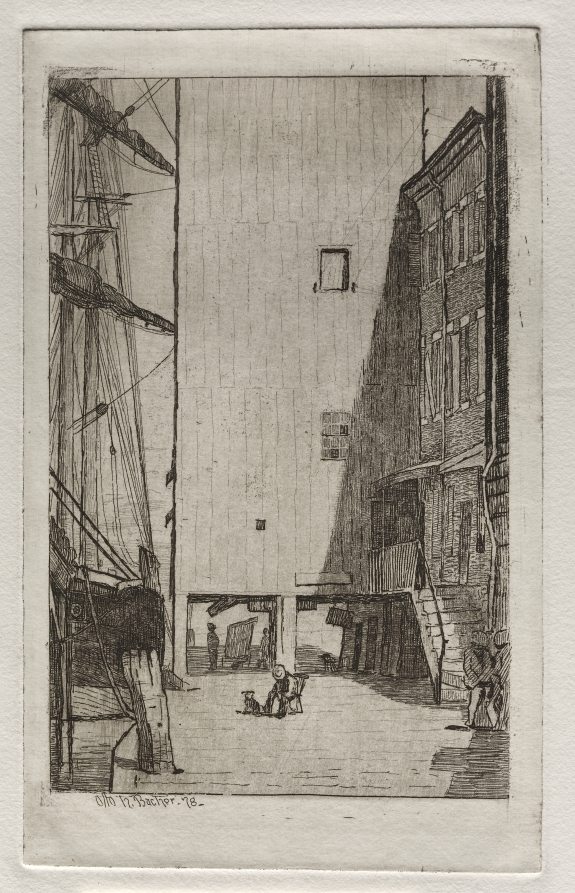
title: Ship and Elevator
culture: America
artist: Otto H. Bacher (American, 1856–1909)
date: 1878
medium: etching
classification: Print